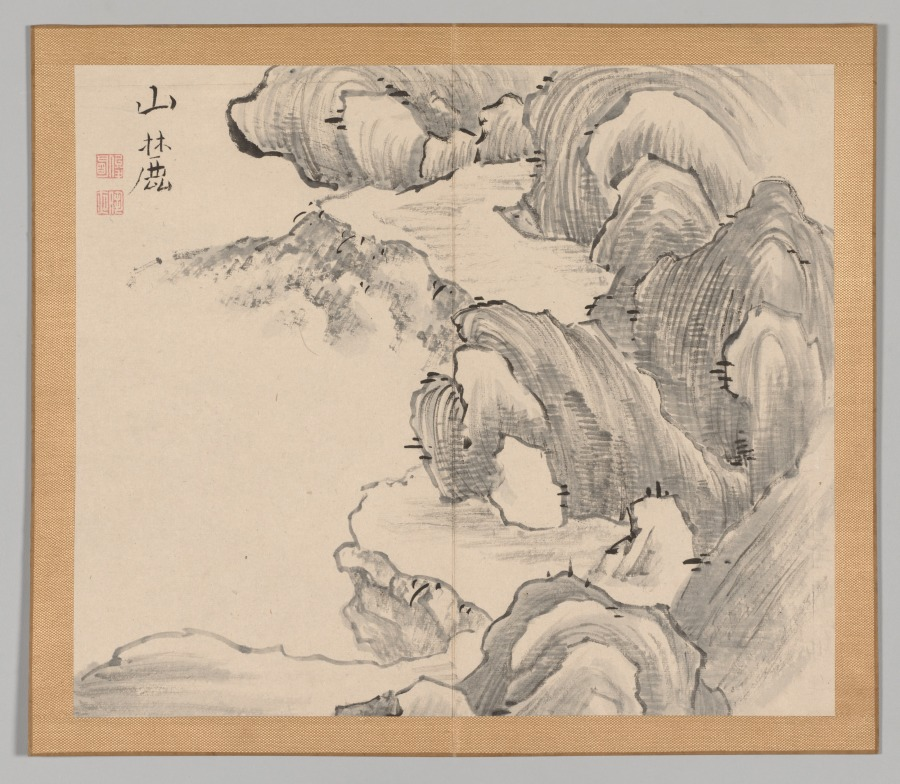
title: Reverberations of Taiga, Volume 1 (leaf 28)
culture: Japan, Edo period (1615–1868)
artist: Aoki Shukuya (Japanese, d. 1802)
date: mid- to late 1700s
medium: double-leaf from a pair of albums; ink and light color on paper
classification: Portfolio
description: Traditionally, young painters in Japan began their studies with an established master-painter. The master's compositions invariably became models that the apprentice copied to learn various ink and brush techniques. Shukuya was a pupil of the famous Kyoto artist Ikeno Taiga, whose style is reflected in these sketches of rocks, trees, and mountains.